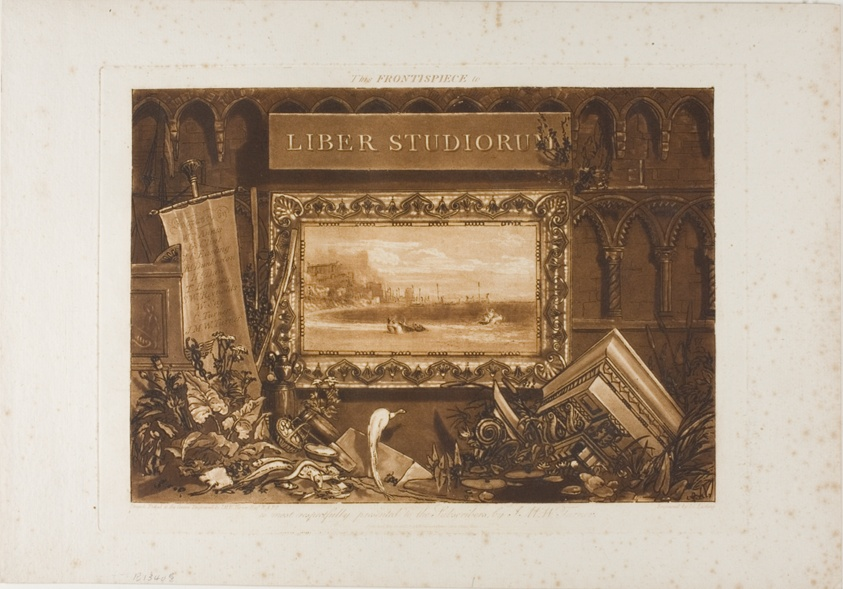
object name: Print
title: The Frontspiece to Liber Studiorum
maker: Joseph Mallord William Turner (English, 1775-1851); border engraved by J.C. Easling (British, active 19th century)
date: published May 23, 1812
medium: Etching and engraving in brown on ivory laid paper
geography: England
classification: etching; print; prints and drawing